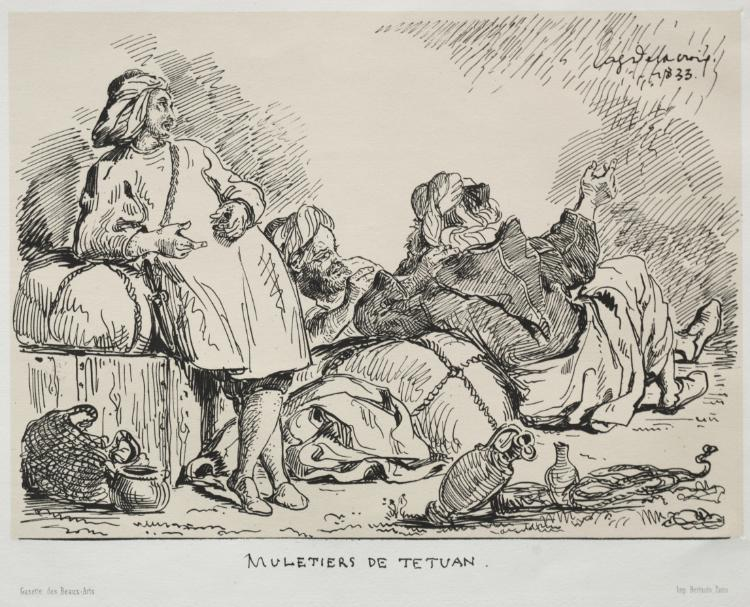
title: Muleteers of Tétuan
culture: France, 19th century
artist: Eugène Delacroix (French, 1798–1863)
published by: Bertauts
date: 1833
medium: lithograph with beige tint stone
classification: Print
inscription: signed and dated in stone, upper right: Eug Delacroix 1833; lower margin, in stone: Muletiers de Tetuan; lower left margin, printed: Gazette des Beaux-Arts; lower right margin, printed: Imp. Bertauts, Paris